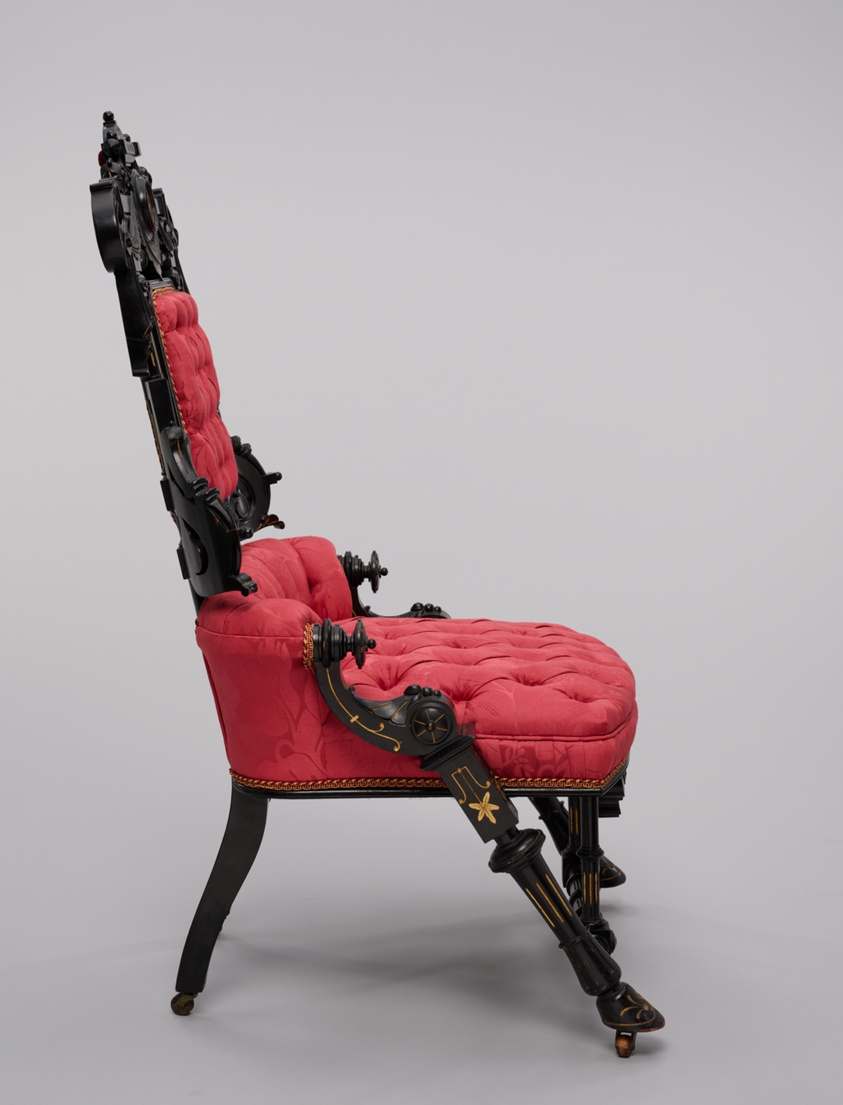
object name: Furniture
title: Armchair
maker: George Jakob Hunzinger (American, born Germany, 1835–1898)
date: About 1869; patented in 1869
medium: Ebonized walnut with gilt decoration and upholstery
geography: New York City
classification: seating; furniture; american decorative arts; american arts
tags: furniture